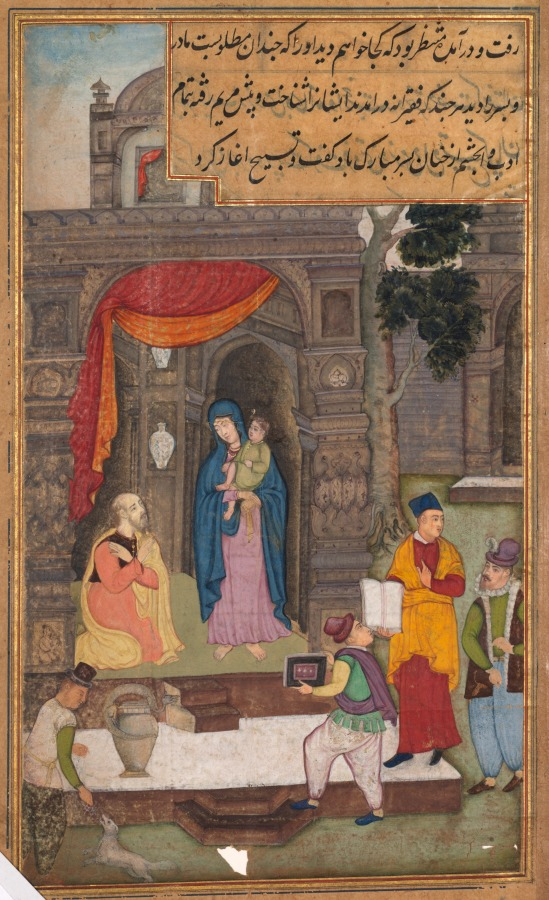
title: Simeon Kneels in Front of Mary and Jesus after Recognizing Them (folio 40 recto), from a Mirror of Holiness (Mir’at al-quds) of Father Jerome Xavier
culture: Mughal India, Allahabad, made for Prince Salim (1569–1627)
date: 1602–4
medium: Gum tempera, ink, and gold on paper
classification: Manuscript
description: Simeon had heard a prophecy that he would encounter the Messiah with his mother in the temple at Jerusalem. This painting depicts his moment of recognition that the prophecy had come true. The temple is populated by Jewish teachers and scholars, and a number of unusual visual elements. A dragon-headed vase is set by the stairs, and niches for vases flank the entrance, possibly in reference to Mary’s status as a vessel for the divine. The form of the temple itself seems to be an imaginative combination of Hindu temple architecture and a Mughal palace.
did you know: A man in the lower left offers grapes to a dog.